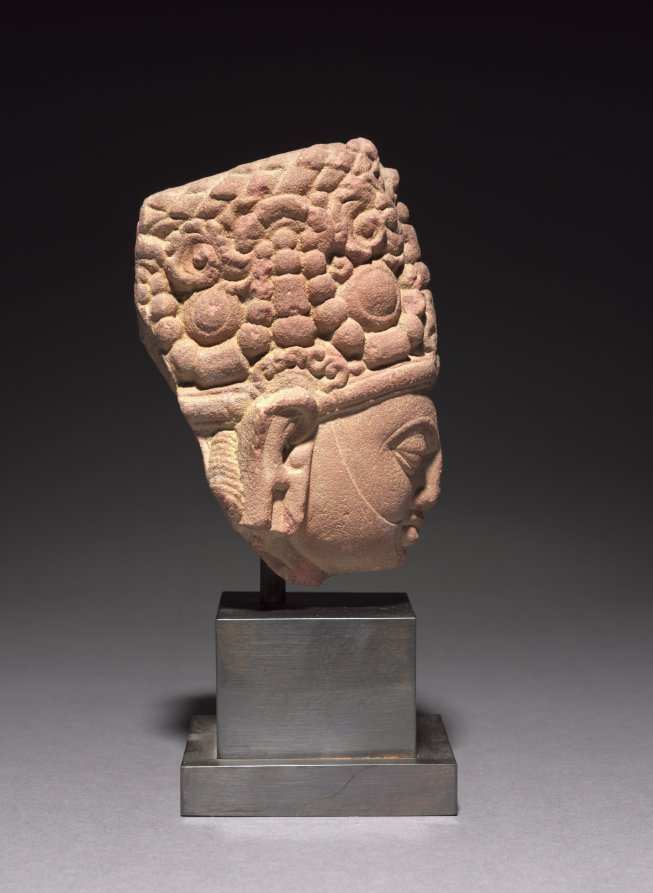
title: Head of Surya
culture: India, Mathura, Post-Gupta period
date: c. 500s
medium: spotted red sandstone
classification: Sculpture